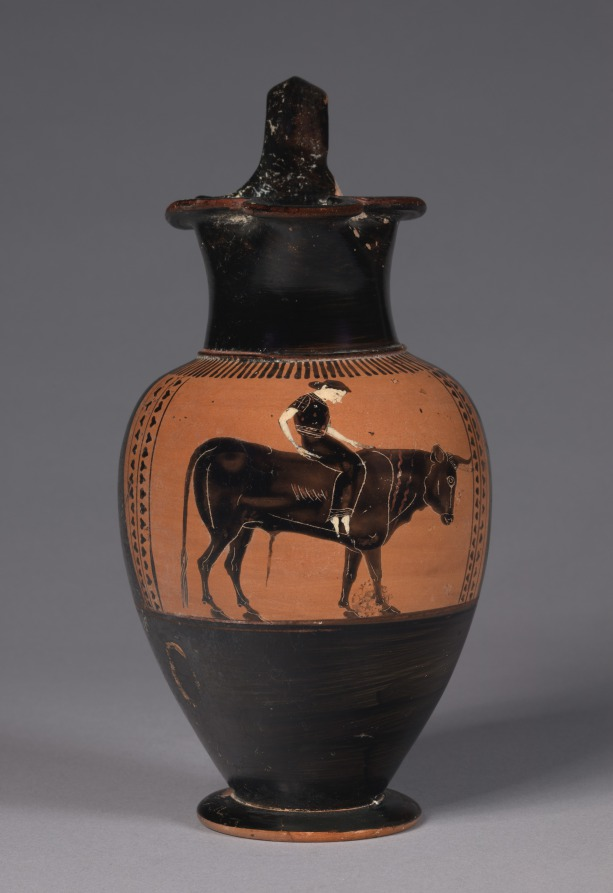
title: Black-Figure Trefoil Oinochoe (Wine Jug): Europa on Bull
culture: Greek, Attic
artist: attributed to Class of Vatican 440 (Greek, Attic)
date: c. 530 BCE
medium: ceramic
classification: Ceramic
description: Calmly seated sidesaddle on a bull, the woman depicted on the front of this small wine jug probably represents Europa, the Phoenician princess abducted by the Greek god Zeus. According to myth, Zeus either sent a bull or transformed himself into one, then carried Europa across the sea to Crete. There, she bore Zeus two or three sons, including the legendary king Minos. The bull ascended to the sky as the constellation Taurus.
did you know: The continent of Europe takes its name from Europa, a Phoenician princess abducted by Zeus.